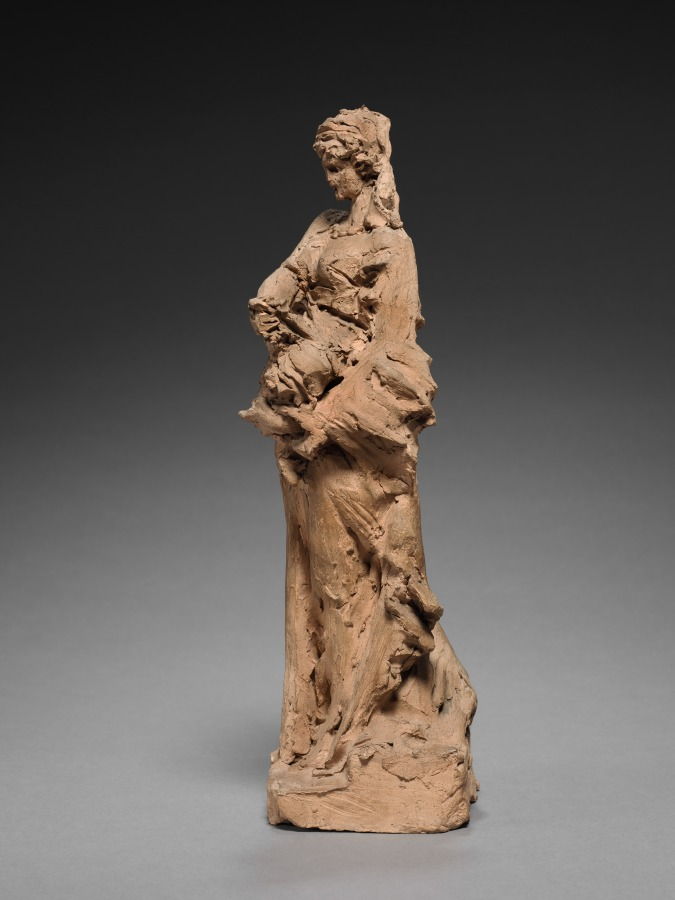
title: Judith with the Head of Holofernes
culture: France, 19th century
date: mid-1800s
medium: terracotta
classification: Sculpture